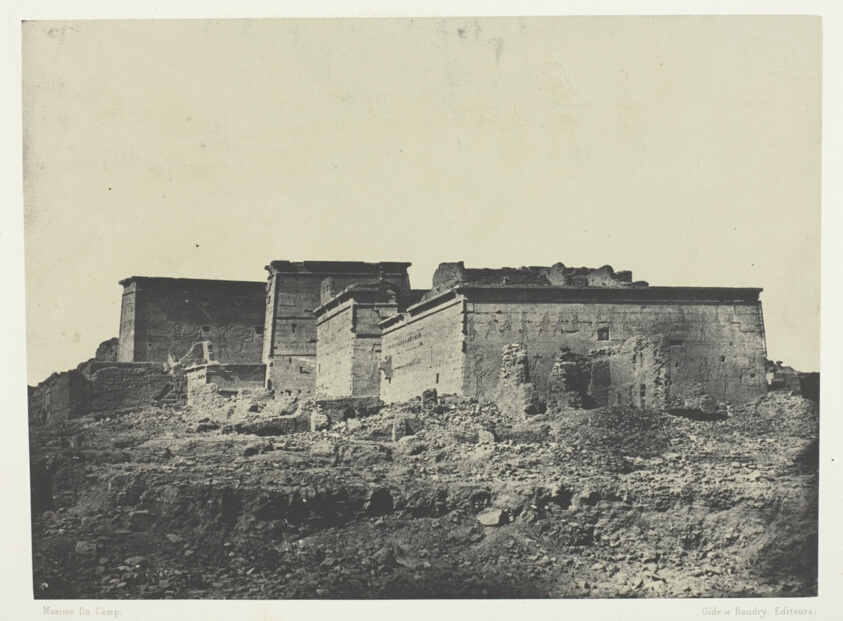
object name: Photograph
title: Grand Temple d'Isis à Philoe, Vue Générale Prise du Nord; Nubie, plate 80 from the album "Egypte, Nubie, Palestine et Syrie" (1852)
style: 19th century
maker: Maxime Du Camp (French, 1822–1894)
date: 1849/51, printed 1852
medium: Salted paper print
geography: France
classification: salted paper print; photographic process; photography; photograph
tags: Collected by Hugh Edwards, Egypte, Nubie, Palestine et Syrie